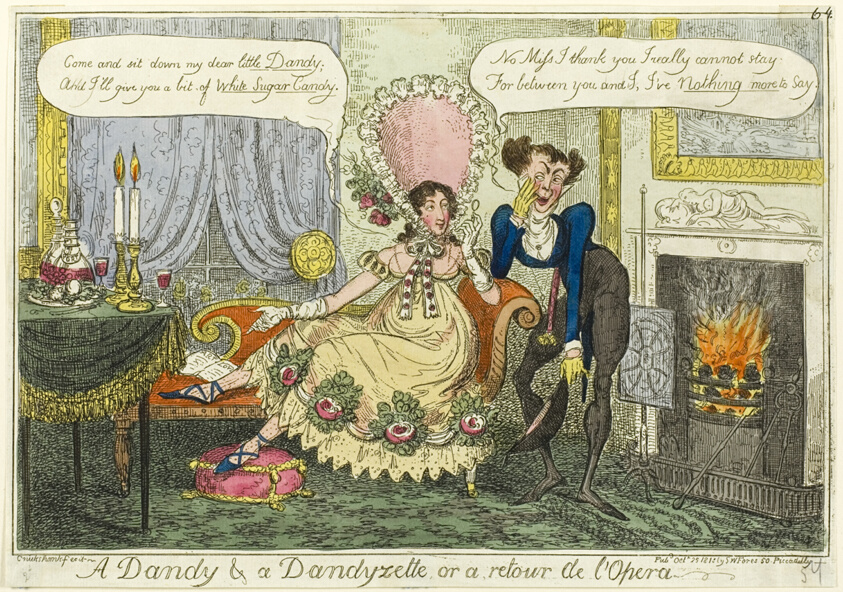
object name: Print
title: A Dandy & a Dandyzette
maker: George Cruikshank (English, 1792-1878); published by S.W. Fores (English, 1761-1838)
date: published October 25, 1818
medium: Hand-colored etching on paper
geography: England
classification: etching; print; prints and drawing